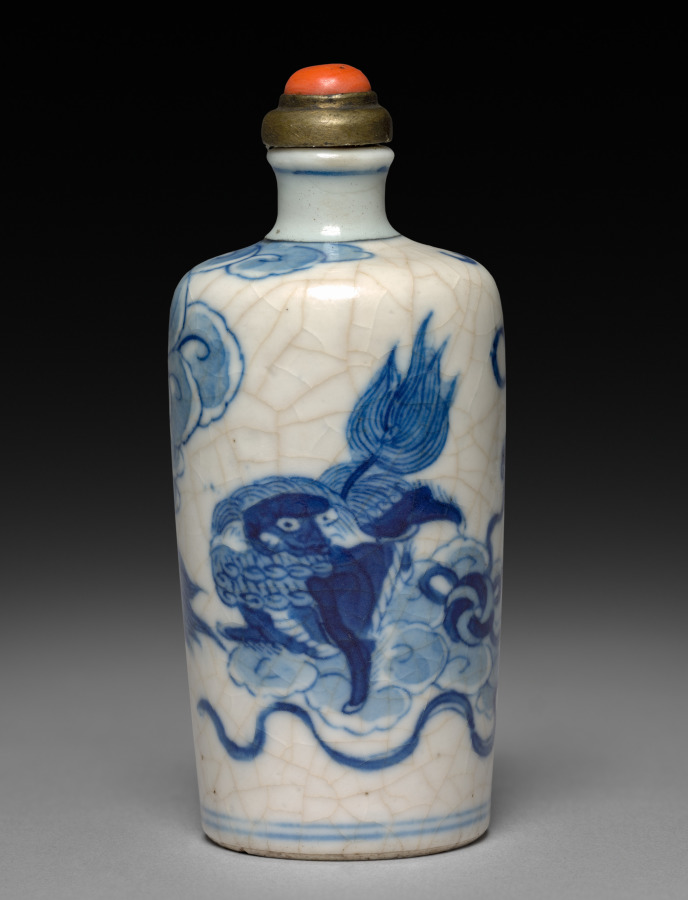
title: Snuff Bottle with Stopper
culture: China, Jiangxi province, Jingdezhen kilns, Qing dynasty (1644-1911), Yongzheng reign (1722-35)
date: 1723–35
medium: porcelain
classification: Ceramic